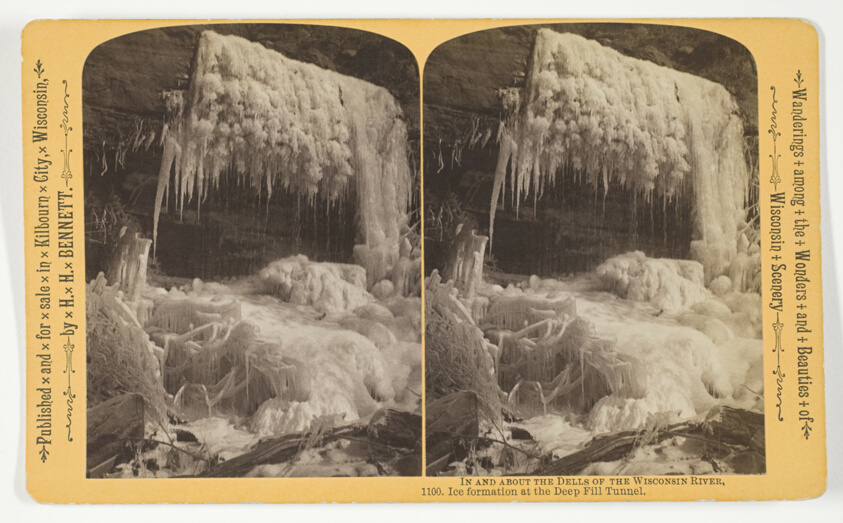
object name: Photograph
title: Ice formation at the Deep Fill Tunnel, No. 1100 from the series "In and About the Dells of the Wisconsin River"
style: 19th century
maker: Henry Hamilton Bennett (American, born Canada, 1843-1908)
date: 1870/1908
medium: Albumen print, stereo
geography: Wisconsin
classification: photography; photograph; albumen silver print; stereograph (albumen)